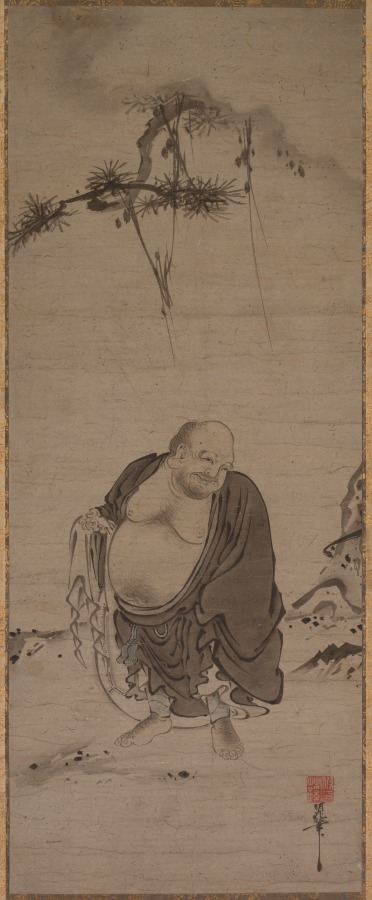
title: Hotei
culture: Japan, Muromachi period (1392–1573)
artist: Kichizan Minchō (Japanese, 1352–1431)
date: late 1300s–early 1400s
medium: hanging scroll; ink and slight color on paper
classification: Painting